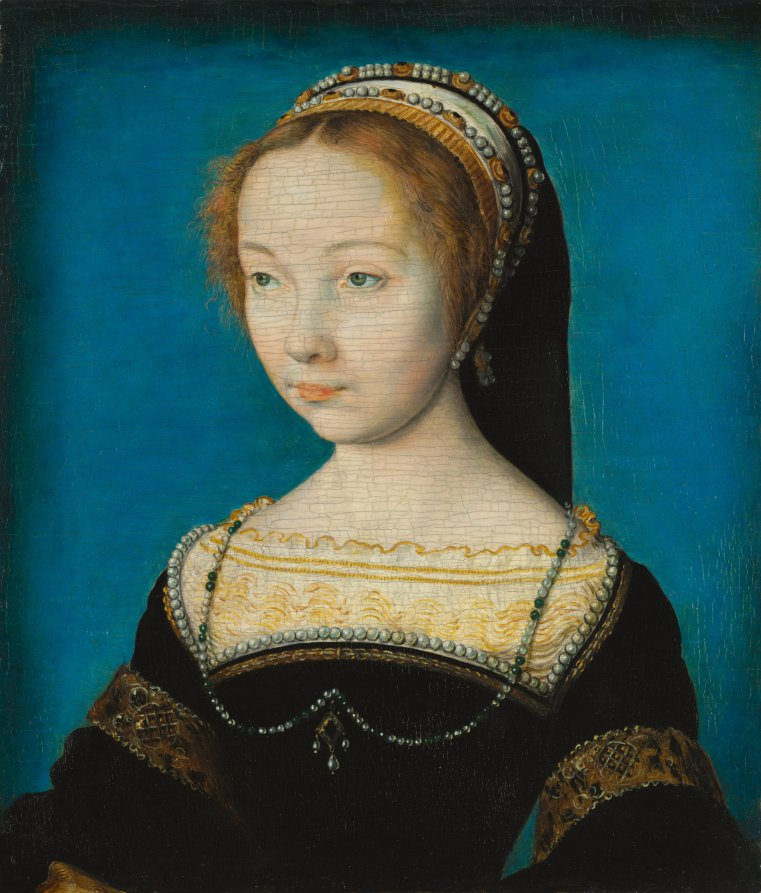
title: Portrait of a Woman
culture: Netherlandish, active France, 16th century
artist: Corneille de Lyon (Netherlandish, 1500/10–1574)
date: c. 1540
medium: oil on wood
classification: Painting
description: Corneille de Lyon worked both for the French court and wealthy merchants. His distinctive northern style stood in contrast to the taste for Italian Renaissance painting and connected closely to portrait miniatures and manuscript painting. Recent conservation treatment has restored the smooth, enamel-like background and the meticulous rendering of detail.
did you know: Gold leaf was applied to the details of the sitter’s headdress and embroidery on her dress.